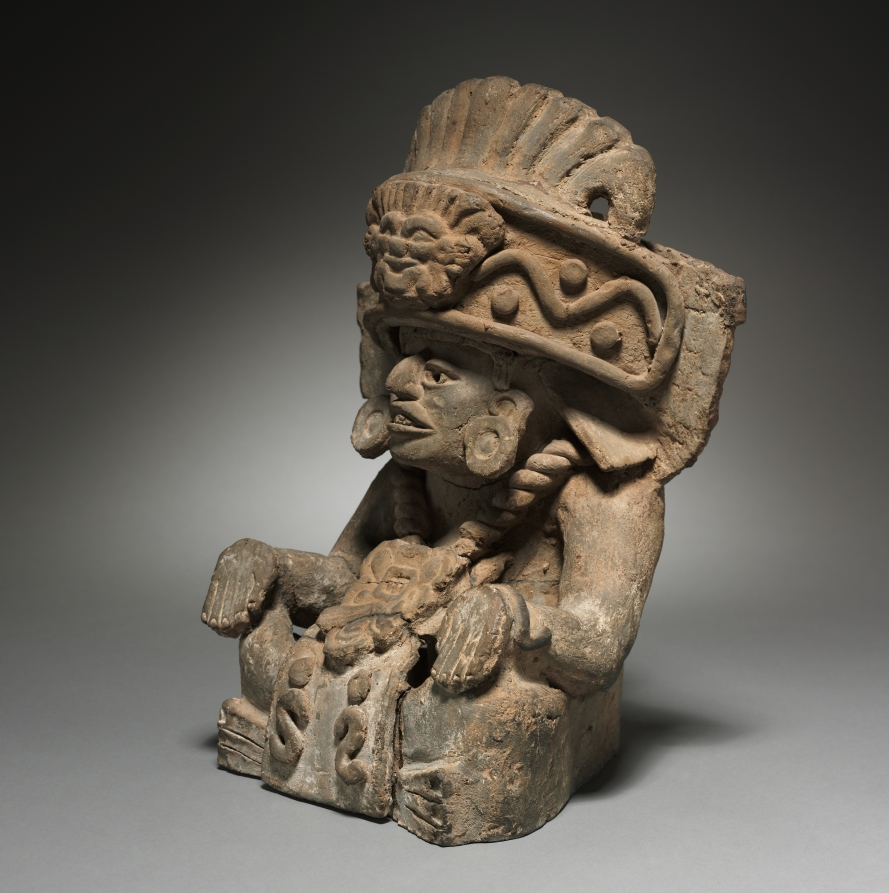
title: Funerary Urn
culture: Mexico, Oaxaca, 5th-6th Century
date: 400s-500s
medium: earthenware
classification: Sculpture